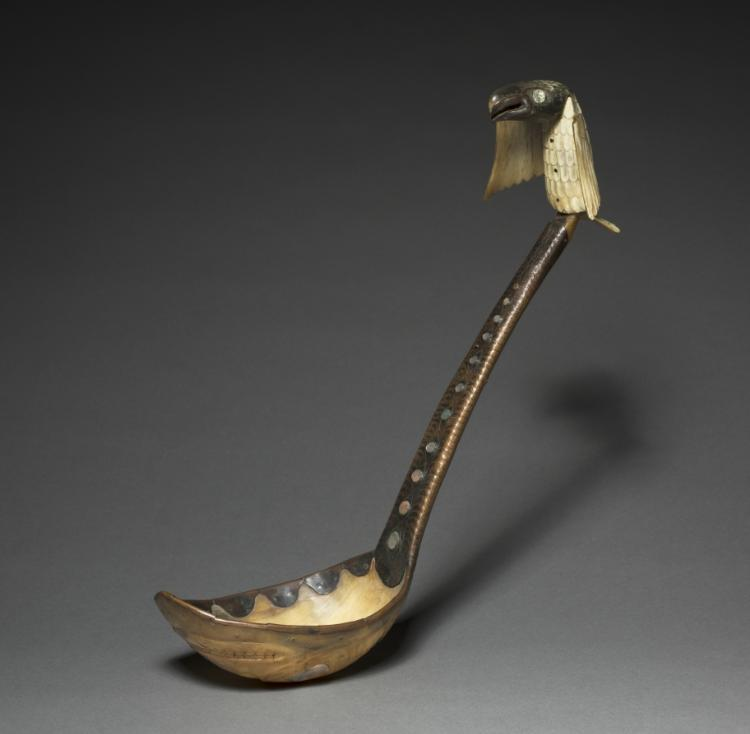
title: Feast Ladle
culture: Native North America, Northwest Coast, Alaska, Tlingit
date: late 1800s–early 1900s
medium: horn, bone, copper, abalone shell inlay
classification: Miscellaneous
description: Elaborate utensils, valuable possessions of Northwest Coast noble clans, were used during potlatch feasts. An imposing eagle hovers, patron-like, over this ladle’s bowl and the bounty it once served; a bear’s head appears on the underside of the bowl. Both may be crests, motifs that, like European heraldry, were exclusive to important families and referred to their histories and rights to control land and resources.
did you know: An imposing eagle presides over the bowl of this impressive ladle.